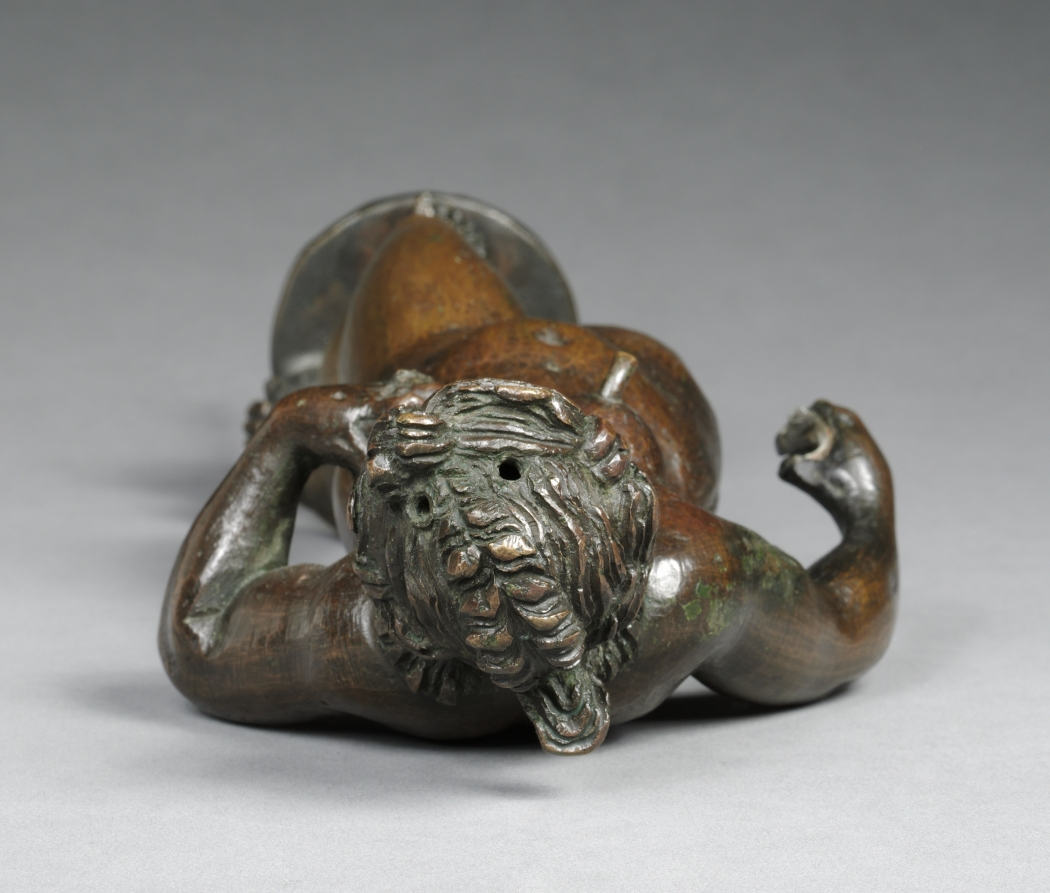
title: Fountain Figure of Abundance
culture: Germany, Augsburg, 16th century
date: c. 1530–40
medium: bronze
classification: Sculpture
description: The spout coming out of the breast indicates that this figure was part of a table fountain--a specialty of Augsburg artists. Her nudity and naturalistic proportions demonstrate the impact of Italian Renaissance art in southern Germany during the early 1500s.